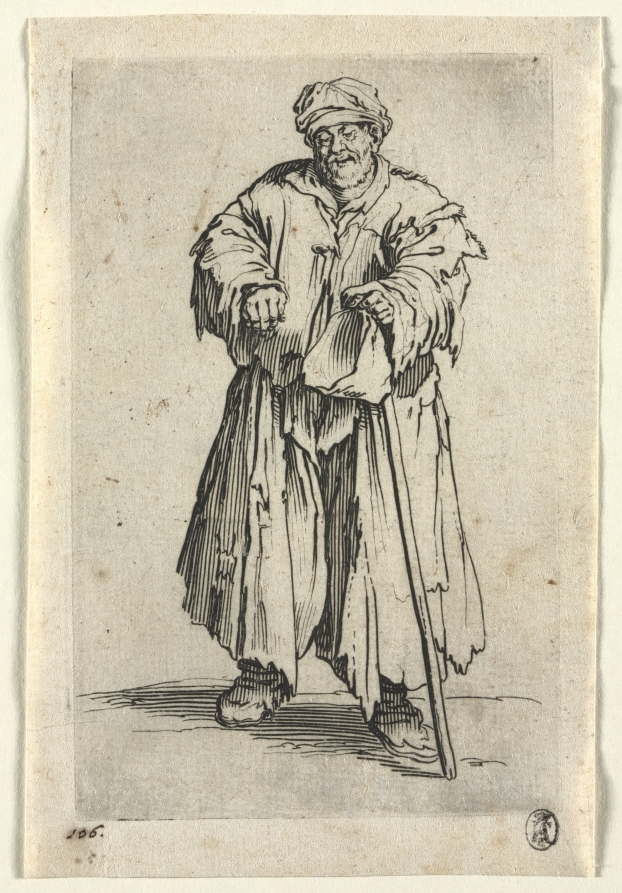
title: The Beggars: Obese Beggar with Lowered Eyes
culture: France, 17th century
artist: Jacques Callot (French, 1592–1635)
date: c. 1623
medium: etching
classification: Print